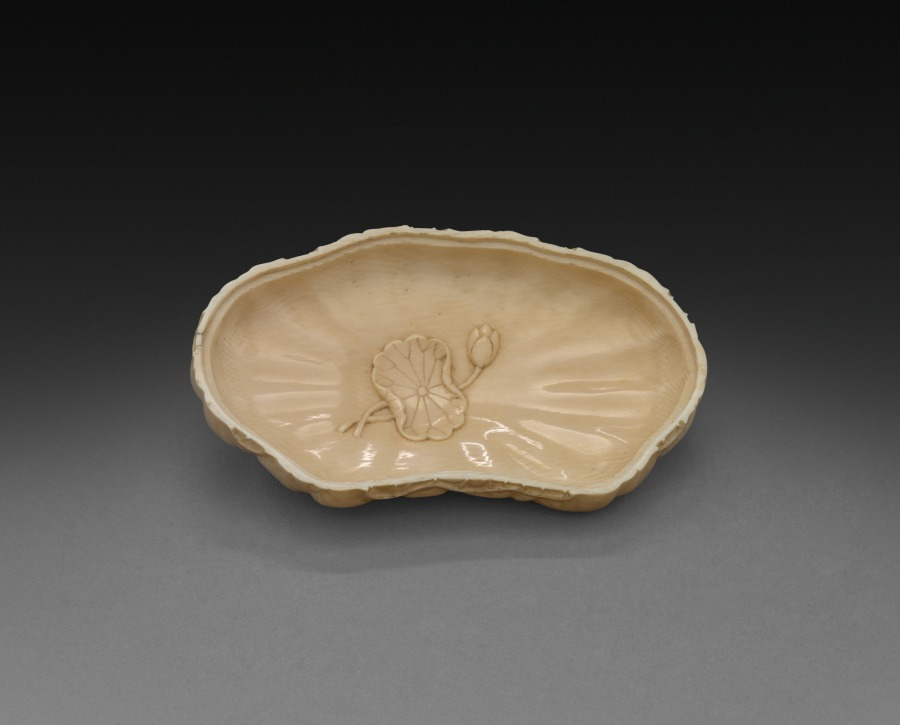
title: Box in Form of Lotus Leaf (lid)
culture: China, Qing dynasty (1644-1911)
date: 1700s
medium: ivory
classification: Ivory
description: In the Qing dynasty (1644–1911), luxury items became more affordable to larger parts of the society, including women, merchants, and literati in non-official positions. Imperial patronage and a growing urban population encouraged consumption of luxury goods and local craftmanship. This fine grained, light yellow ivory carved the the shape of a lotus leaf illustrates the superb carving skills and the creative mind of the talented artisan who sought clients on a competitive market.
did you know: Inside each box is a lotus pond and two swimming ducks carved in high relief.